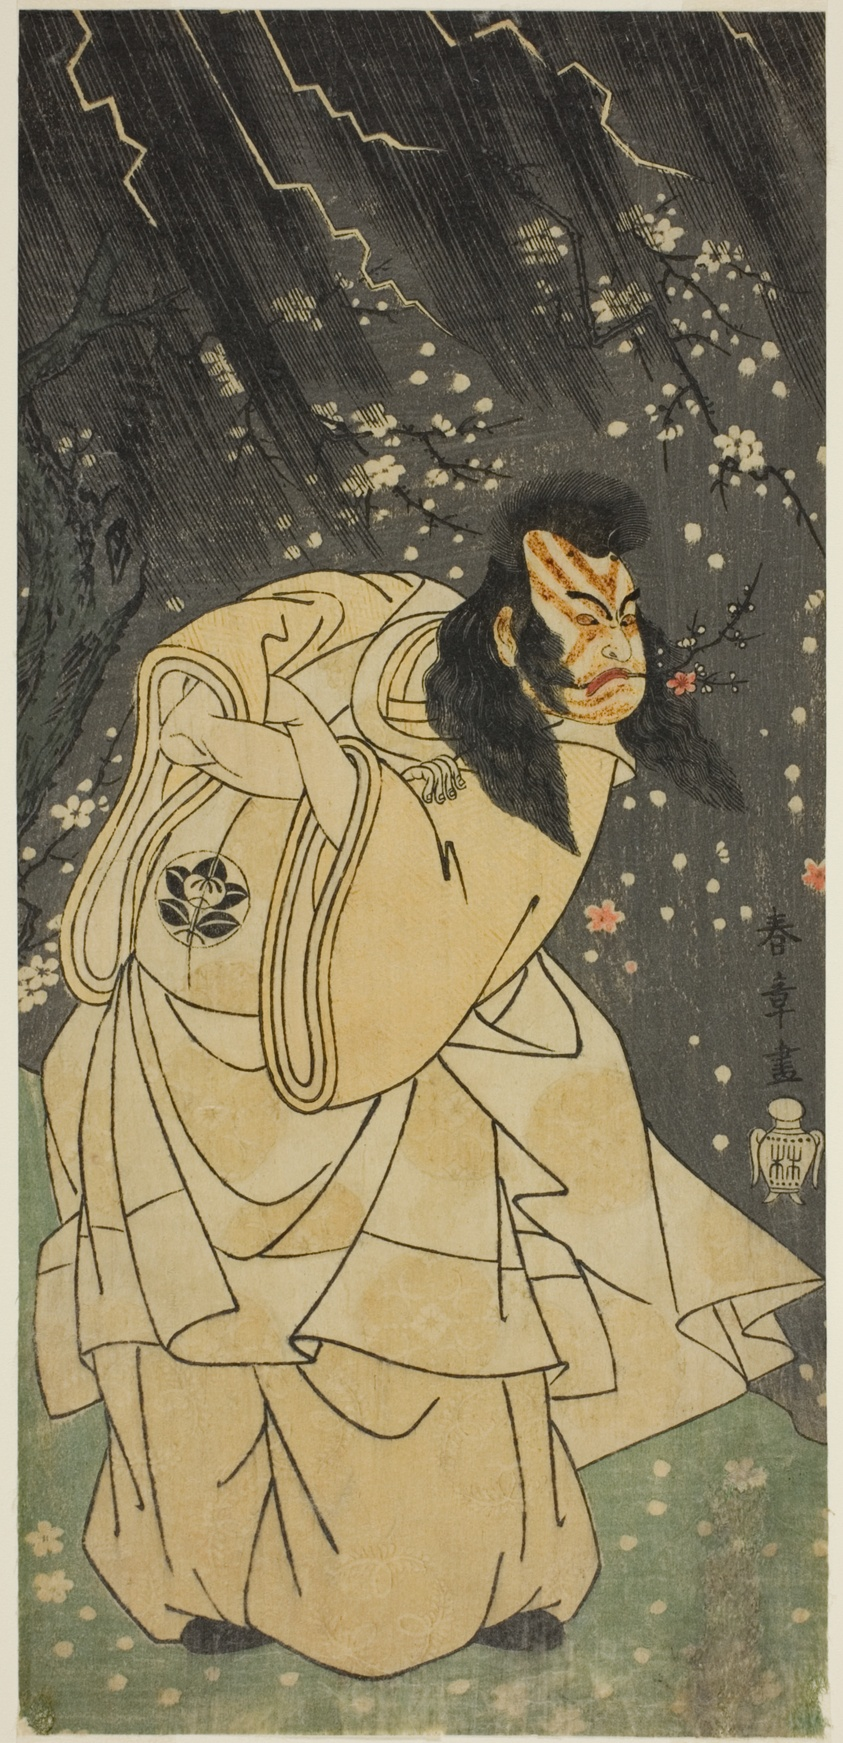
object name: Print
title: The Actor Ichimura Uzaemon IX as Kan Shojo in the Play Sugawara Denju Tenarai Kagami, Performed at the Ichimura Theater in the Eighth Month, 1768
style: Japanese (culture or style)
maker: Katsukawa Shunsho 勝川 春章; Japanese, 1726-1792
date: c. 1768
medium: Color woodblock print; hosoban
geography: Japan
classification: woodblock print; print; asian art